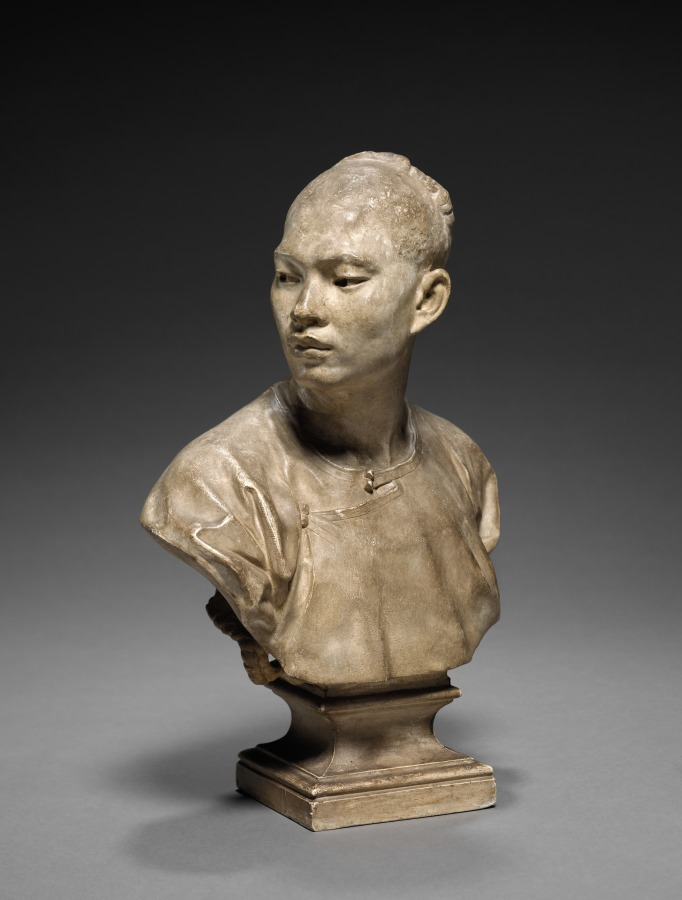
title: Bust of a Chinese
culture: France, 19th century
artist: Jean-Baptiste Carpeaux (French, 1827–1875)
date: 1867–68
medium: plaster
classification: Sculpture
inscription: inset into bust near base at rear is struck copper plate inscribed: "PROPRIETE CARPEAUX" with an eagle in the center.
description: This bust is related to the allegorical figure of Asia in Carpeaux's monumental bronze fountain, The Four Parts of the World Upholding the Celestial Sphere, commissioned by Baron Haussmann in 1867 for the Luxembourg Gardens in Paris. The figure was changed into a woman in the fountain and reflects the artist's interest in accurately portraying different ethnic groups. This bust exists in various sizes and media.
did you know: Greatly admired during his time, Jean-Baptiste Carpeaux received important commissions from French Emperor Napoleon III and Baron Georges-Eugène Haussmann.